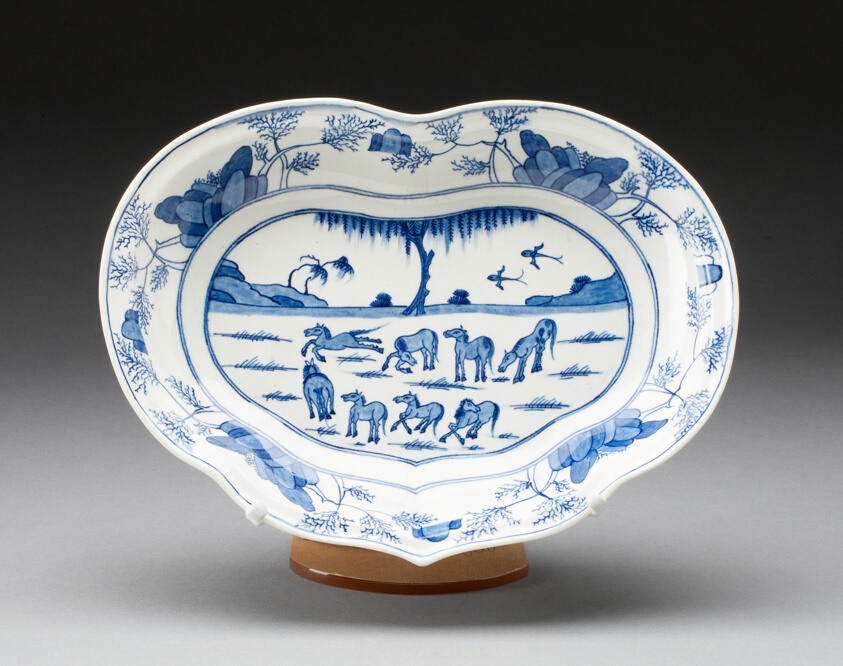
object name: Ceramics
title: Dish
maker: Worcester Porcelain Factory (Warmstry House Period, 1751–1783); Worcester, England, founded 1751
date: c. 1770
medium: Soft-paste porcelain, underglaze blue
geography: Worcester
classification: dish (vessel); porcelain; european decorative arts; ceramics